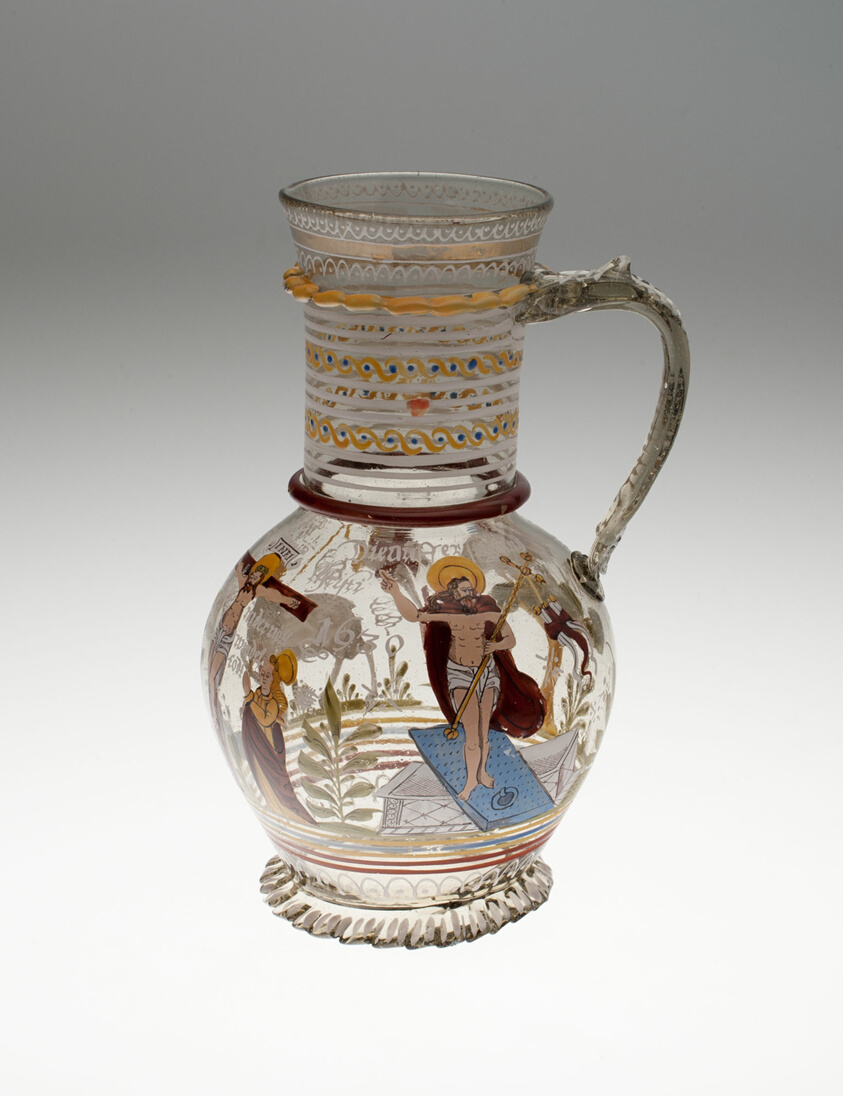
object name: Glass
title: Wine Jug with the Lamb of God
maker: Germany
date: c. 1630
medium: Glass with enamel decoration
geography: Germany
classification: glass; european decorative arts